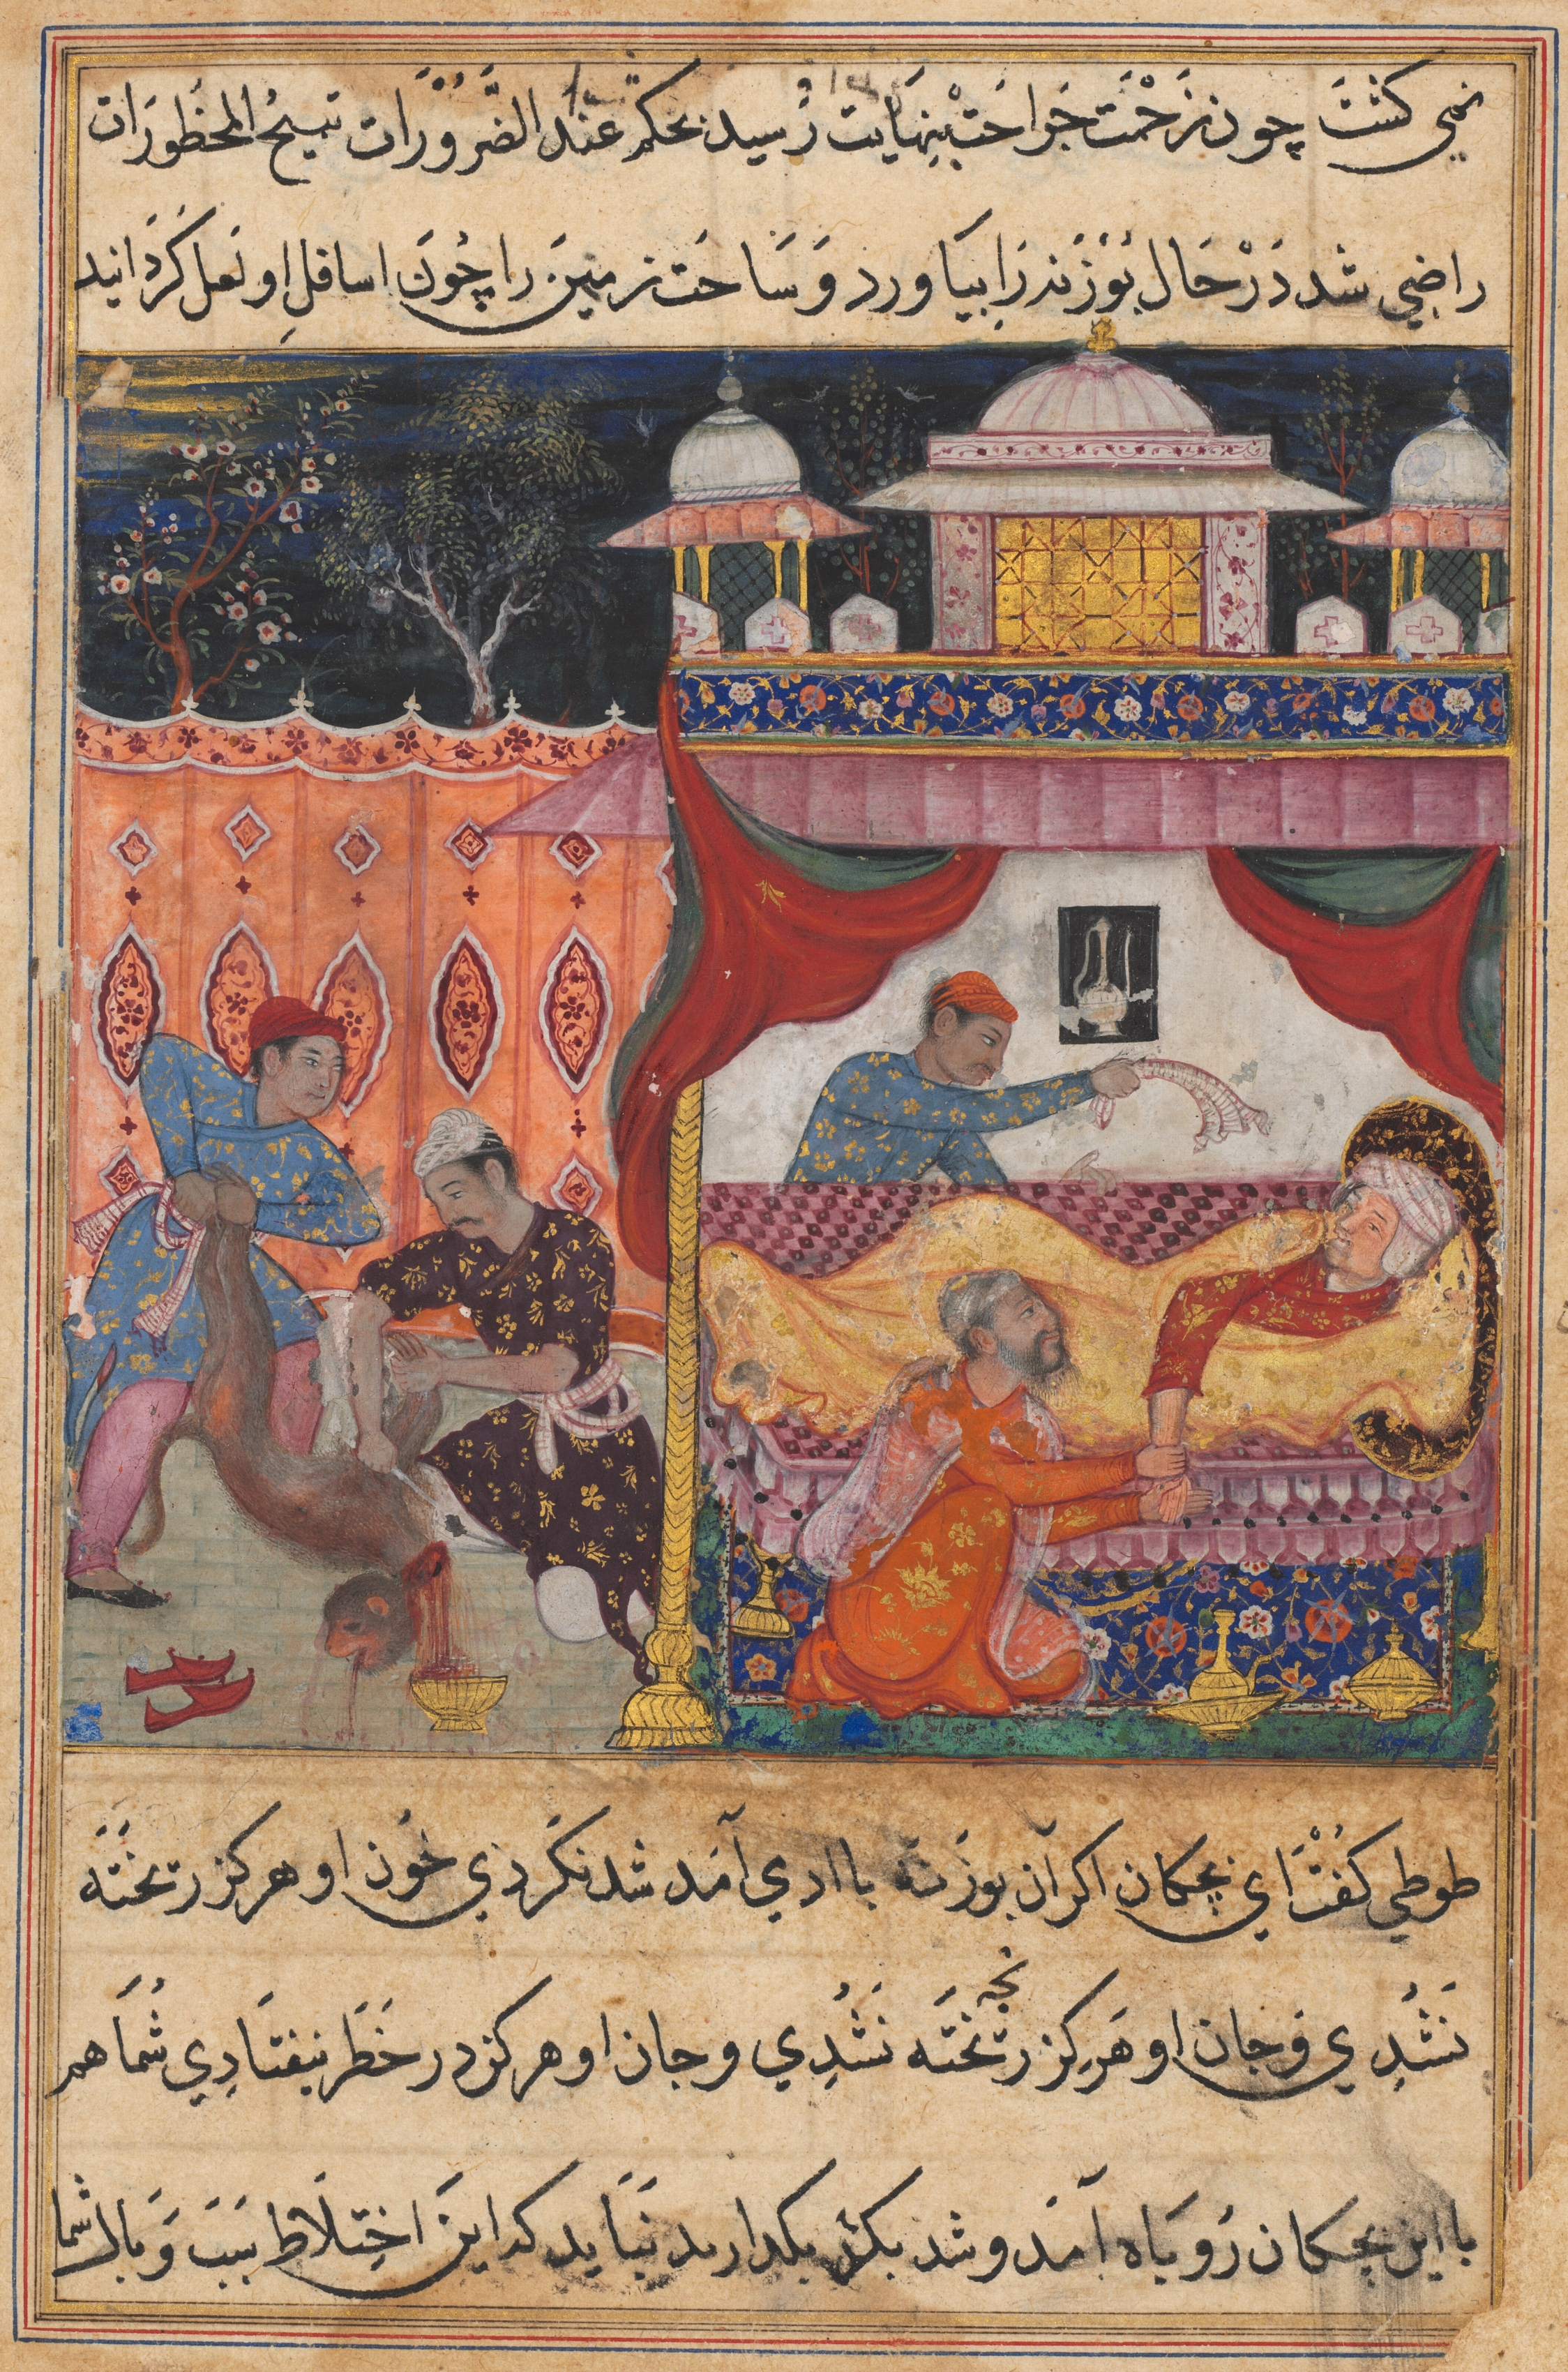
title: Page from Tales of a Parrot (Tuti-nama): text page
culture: Mughal India, court of Akbar (reigned 1556–1605)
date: c. 1560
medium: gum tempera, ink, and gold on paper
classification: Painting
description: The book of the Tuti-nama from which this page comes consists of 341 folios, or 682 pages. The 52 tales told by the parrot Tuti to his mistress Khujasta and the overarching frame story about Khujasta herself are all written in Persian. Here the form of the script is called naskh and is read from right to left. The word in blue means “cut,” which indicates that the prose narrative will cut to a poetic verse. The Tuti-nama was written in 1329–30 by a Persian-speaking Sufi scholar and author from Central Asia. He based it on an earlier Persian work that recast a collection of Sanskrit fables from ancient India and other Persian tales. The blending of cultures and ethnicities long pre-dated the Mughals in India.